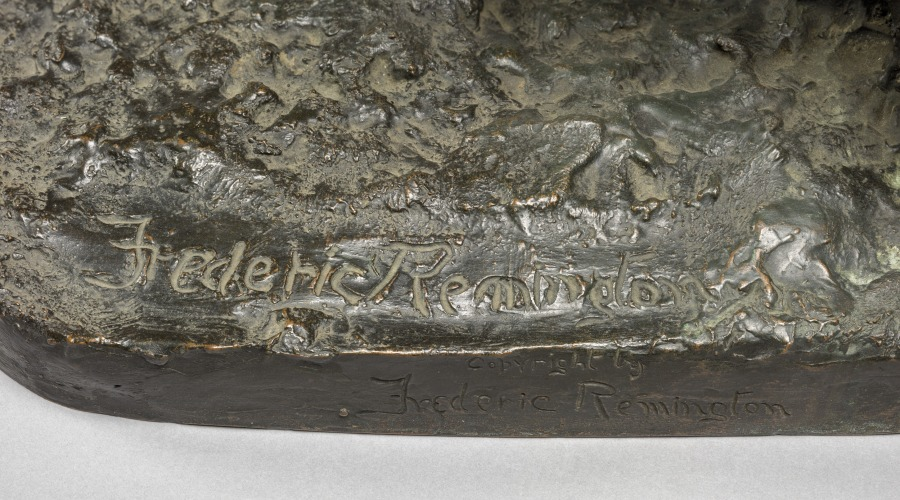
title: Trooper of the Plains-1868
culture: America, early 20th Century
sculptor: Frederic Remington (American, 1861–1909)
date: modeled 1908, cast c. 1911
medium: bronze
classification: Sculpture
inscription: Signed on top of base: Frederic Remington; Inscribed on side of base: Copyright by Frederick Remington, Roman Bronze Works, N.Y.; numbered underneath base: 3